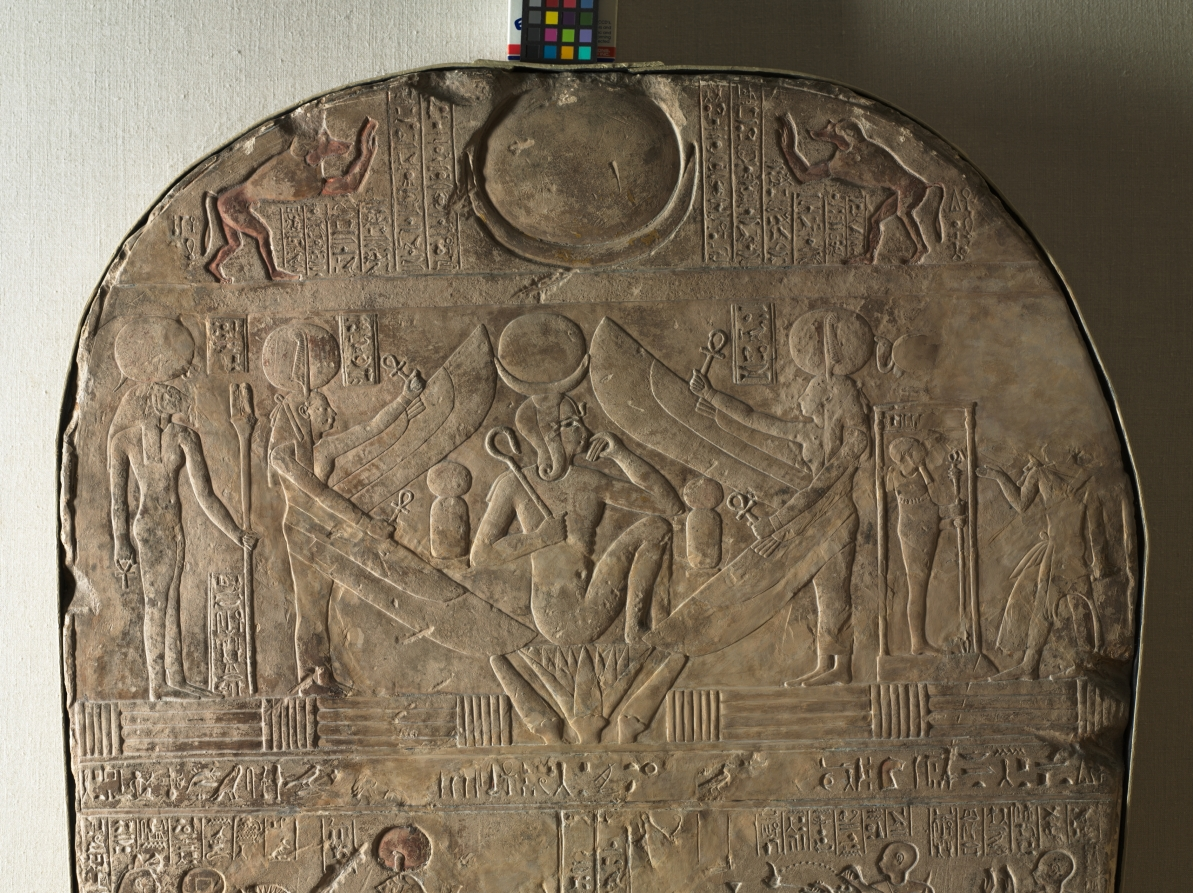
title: Stele of the High Priest of Ptah, Shedsunefertem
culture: Egypt, Third Intermediate (1069–715 BCE), Dynasty 22, reign of Shosheng I (943–922 BCE)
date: 945–924 BCE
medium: limestone, originally painted and gilded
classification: Sculpture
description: This stele of Shedsunefertem, the High Priest of Ptah, is rich in religious symbolism. In the center of the top register is a disk and crescent, originally gilded. At either side a baboon raises its arms in adoration. The Egyptians believed that the jabbering of the baboons at dawn was a hymn of praise to the sun god Ra in a secret language only the king understood. It begins, "Praising Ra when he shines on the horizon." Directly below in the middle register a child god is seated on a lotus flower. In Egyptian mythology the sun arose out of the primeval waters at the dawn of creation in a lotus flower. Winged figures of Maat, goddess of Truth, stand protectively at either side. The damaged figure of the high priest himself, wearing the panther skin and jackal-collar of his office, appears at the far right, worshipping the god Ptah, whose consort, the lioness-headed goddess Sekhmet, appears on the far left. The figures in the bottom register are colleagues who appear here as dependents under the powerful high priest's protection.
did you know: The eye and eyebrow of the young sun-god Ra (at center) were once inlaid.